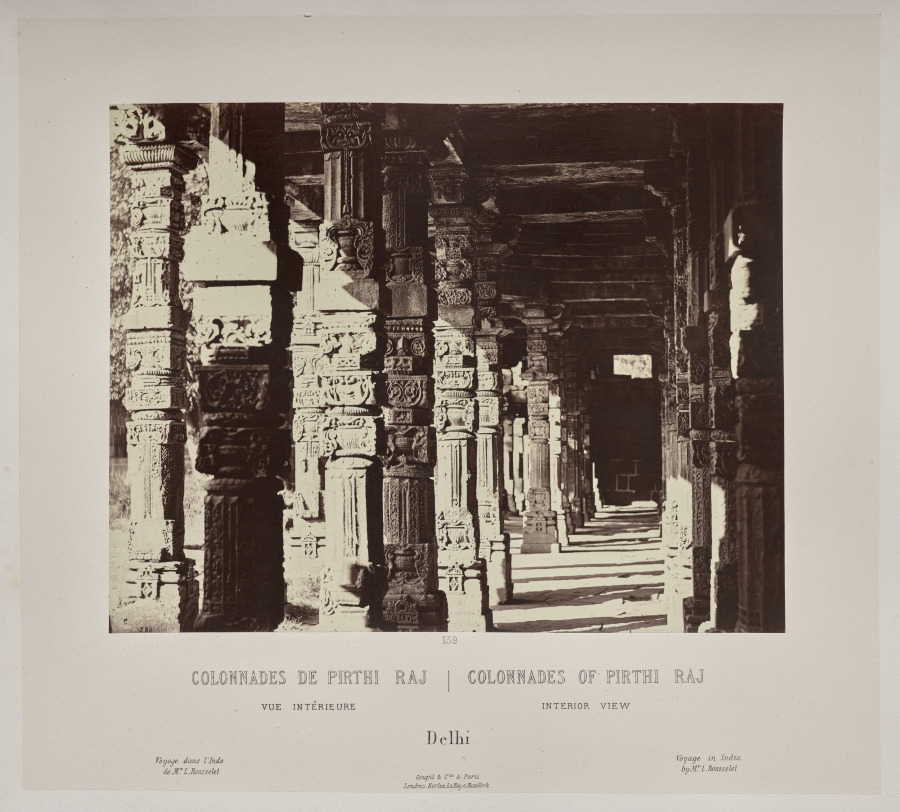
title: Colonnades of Pirthi Raj, Interior View, Delhi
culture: France, 19th century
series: India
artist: Louis-Théophile Marie Rousselet (French, 1845–1929)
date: 1865–68, published 1869–70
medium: Albumen print from glass plate negative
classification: Photograph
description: Concerned that his drawings did not do justice to the splendor of India’s monuments, Rousselet learned photography in India that year, a remarkable accomplishment. He proved to be a talented photographer with a sophisticated sense of composition. The scenes in this volume sweep across sites of Sultanate, Rajput, and Mughal power in northern India, from the sacred Hindu city of Varanasi on the Ganges River to Alwar in Rajasthan. Also included are several scenes of industry and portraits of Indian rulers.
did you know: Louis Rousselet described himself as a “scientific traveler” when he went to India alone at age 18 in 1863 and stayed into 1868.